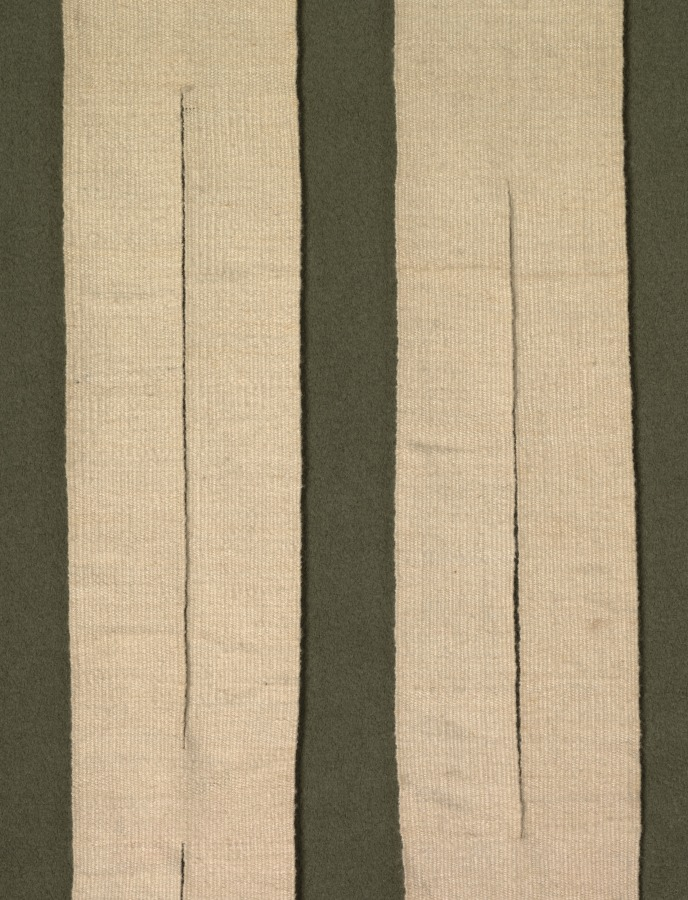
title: Band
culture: Peru, Chimú or Chimú-Inka, 12th-16th century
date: 1100–1532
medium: white cotton; plain weave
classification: Textile